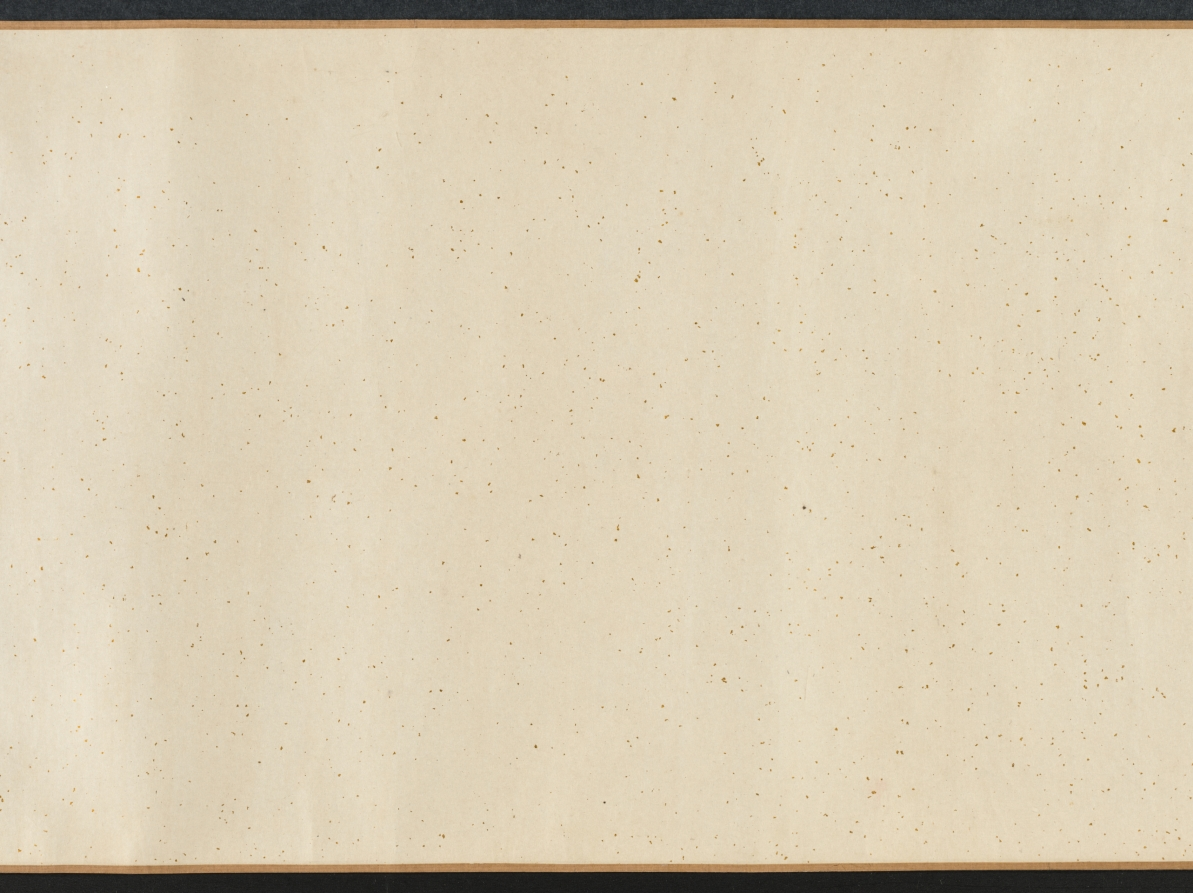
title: Landscape with Bamboo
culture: China, Yuan dynasty (1271-1368)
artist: Song Ke (Chinese, 1327–1387)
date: 1300s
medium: Handscroll; ink on paper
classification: Painting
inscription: 東吳宋克戲為仲幾畏友圖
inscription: 2 colophons and 14 additional seals: 1 seal of Yü Chung-chi (14th c.); 1 seal of Wu Ch'eng (1469 jinshi); 1 colophon and 2 seals of Wu K'uan (1435–1504); 1 colophon and 9 seals of Cheng Qi (1911–1988); 1 seal unidentified.